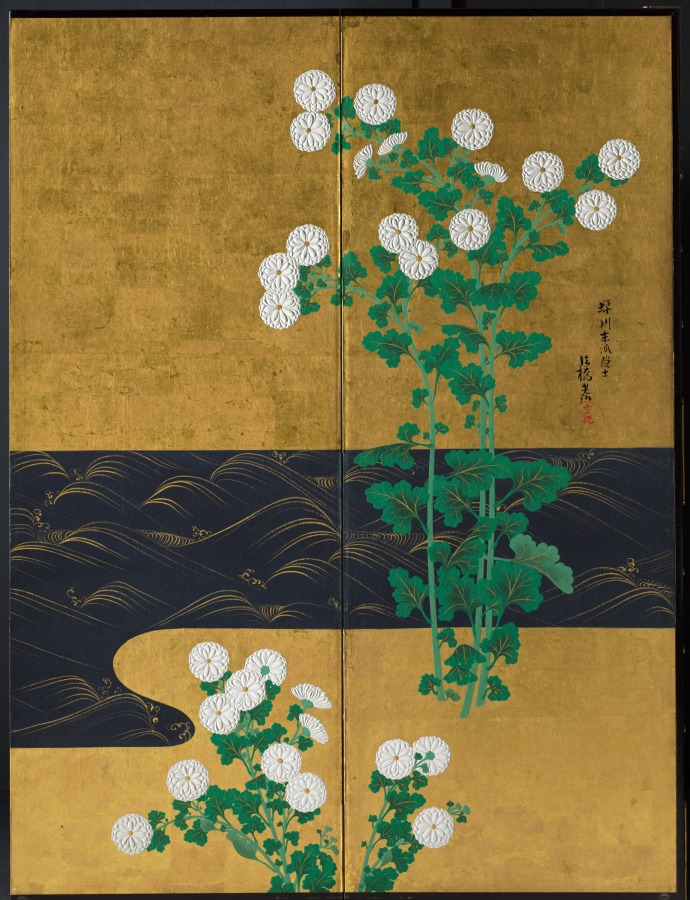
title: Chrysanthemums by a Stream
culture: Japan, Edo period (1615–1868)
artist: possibly by Ogata Kōrin (Japanese, 1658–1716)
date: c. 1715–30 or later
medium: One of a pair of six-panel folding screens; ink and color on gilded paper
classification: Painting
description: These screens recall a painting style so closely identified with Ogata Kōrin (1658–1716) that it is called Rinpa, or “Rin School,” after the ideograph “rin” in his name. The highly stylized background accentuates floral groupings that have been groomed so as to appear utterly artificial, like the synthetic arrangements available today. Kōrin's genius derived in large measure from natural phenomena painstakingly observed and then manipulated to create compositions of startling refinement and sparkling isolation. This process may have grown out of Kōrin's early immersion in the family textile business, a medium that encourages such dramatic distillations of form: the stream's gold-crested waves bring to mind traditional kimono robe designs of Kōrin's era. Works with the signature seen on this painting, including a style name, or persona suggested to Kōrin by his brother Kenzan (1663–1743), are sometimes considered to have been produced either in the last year of his life, when he was very ill, or after his death. In both scenarios, the lion’s share of the work would have been done by studio assistants, but little is truly known of his studio practice. Given the regularity of the gold waves on the stream, and the tension in the arrangement of the chrysanthemums, it is also possible that the screens were made in emulation of Kōrin's designs by a later artist.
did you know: The signature used on these screens may indicate paintings made in the last year of the artist's life, or works completed by his studio after his death.